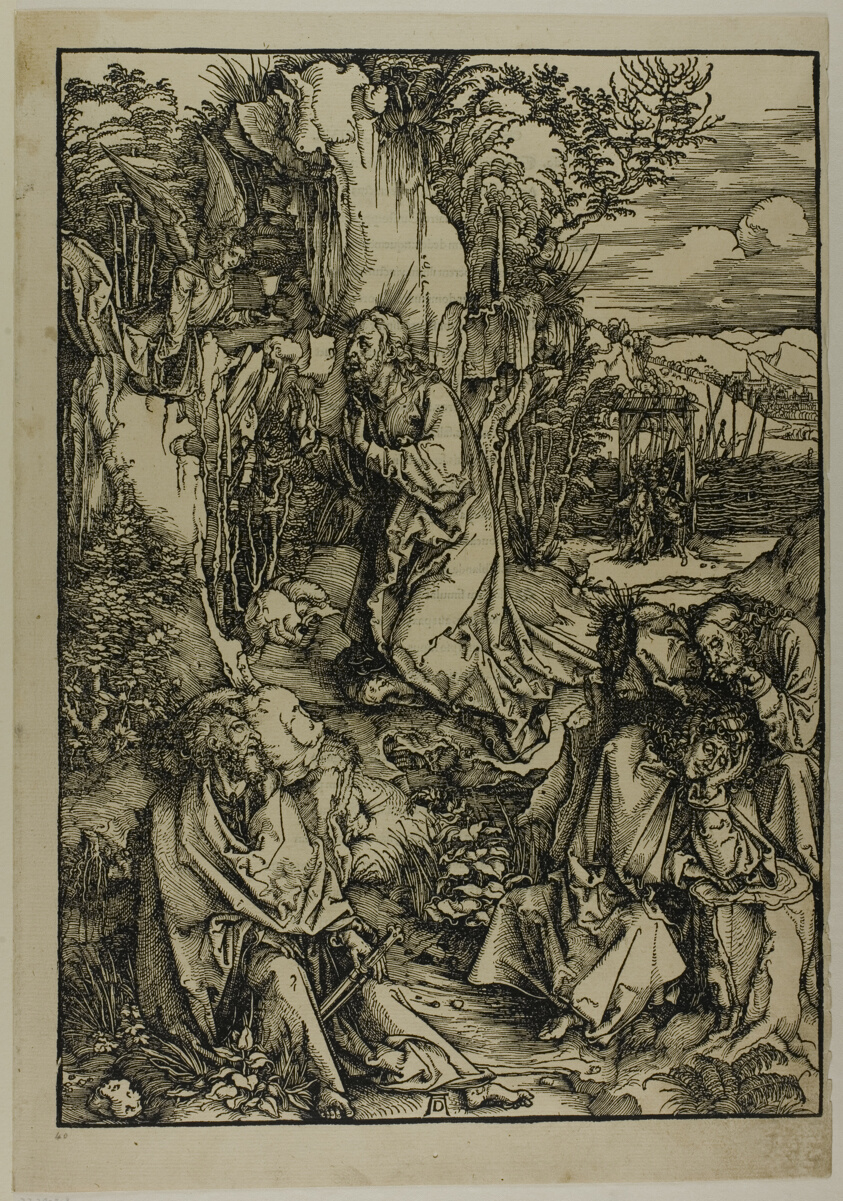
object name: Print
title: Agony in the Garden, from The Large Passion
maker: Albrecht Dürer (German, 1471-1528)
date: c. 1496–97, published 1511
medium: Woodcut in black on cream laid paper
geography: Germany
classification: woodcut; print; prints and drawing; paper